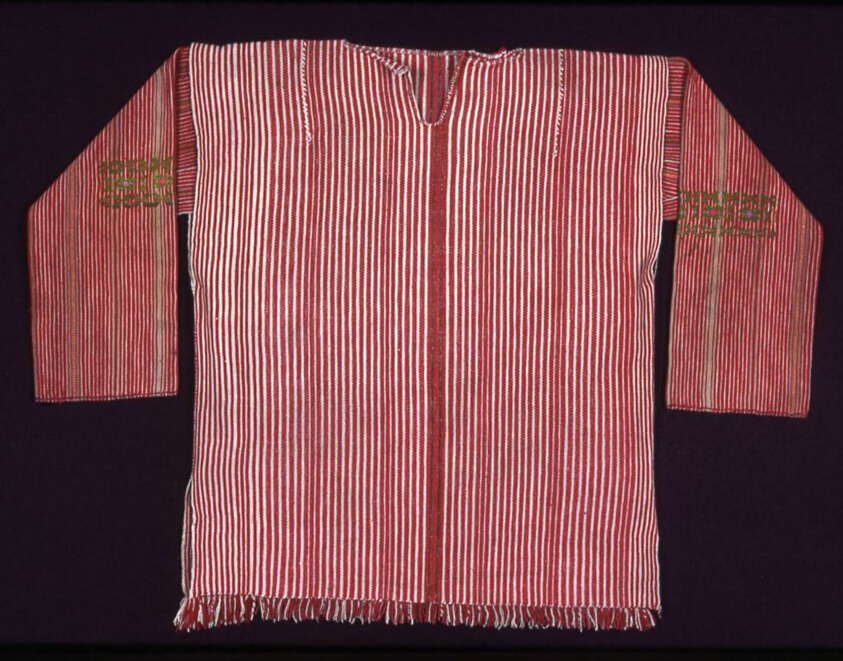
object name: Textile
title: Shirt (Camisa)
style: Folk Art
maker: Maya (Guatemala)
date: 1850/1900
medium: Cotton; warp-faced plain weave in stripes formed by paired warps and wefts; inset sleeves with embroiderd decorations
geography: Guatemala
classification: textile; weaving